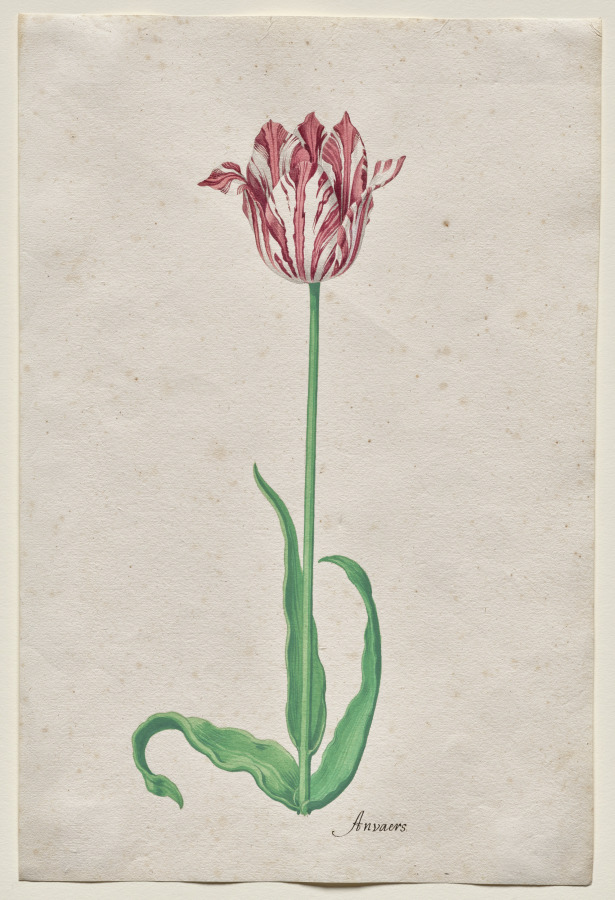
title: Study of a Tulip (Anvaers)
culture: Netherlands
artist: Pieter Holsteyn II (Dutch, c.1612–1673)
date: c. 1645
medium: Point of brush and transparent and opaque watercolors with traces of graphite and gum glazing on antique laid paper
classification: Drawing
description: This image of a tulip was made as part of a tulip book used as a grower’s marketing tool during the so-called tulip mania, a speculative bubble in 17th-century Holland, when ten tulip bulbs could cost more than a stately Amsterdam canal house. The striations on the tulip, which were caused by a virus in the bulb, made it especially valuable. Pieter Holsteyn II was one of many artists in the Netherlands at the time who specialized in botanical illustration.This tulip's name, inscribed on the sheet, is the French word for the city of Antwerp.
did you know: In 17th-century Holland, some tulip bulbs were as expensive as a stately Amsterdam canal house.